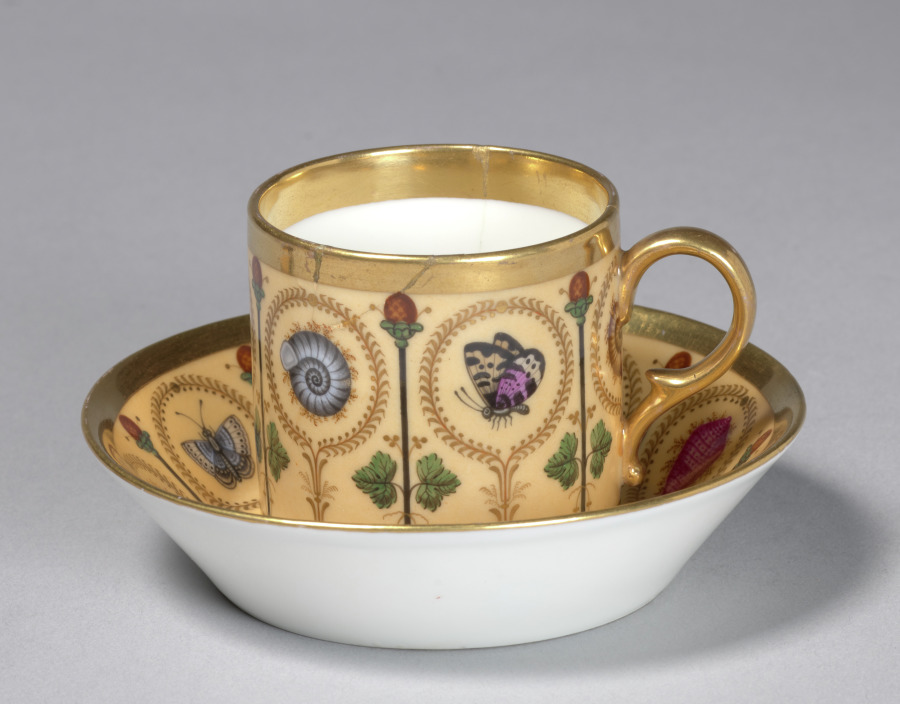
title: Cup and Saucer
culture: France, 19th century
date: c. 1800–1810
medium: porcelain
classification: Ceramic